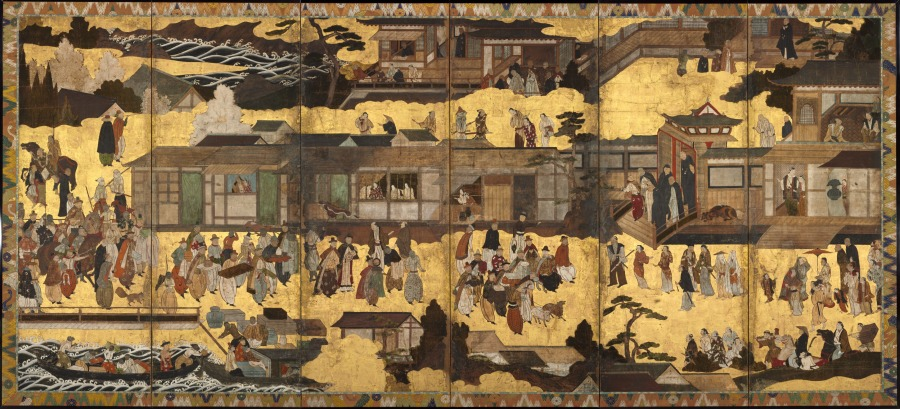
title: Arrival of the "Southern Barbarians"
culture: Japan, Momoyama period (1573–1615)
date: c. 1600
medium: Pair of six-panel folding screens; ink, color, and gold on paper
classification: Painting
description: These screens show European merchants arriving in Japan. Almost certainly the persons represented are Portuguese, since they are accompanied by Roman Catholic priests. Early in the 1600s the Portuguese were forced out of Japan, chiefly because of internal difficulties caused by their missionaries. Later, between 1641 and 1853, the Dutch were the only Europeans permitted to trade with Japan but their presence was restricted to a port town in far western Japan, near present-day Nagasaki.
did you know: Europeans were called "Southern Barbarians" because their ships arrived in Japan from the south.